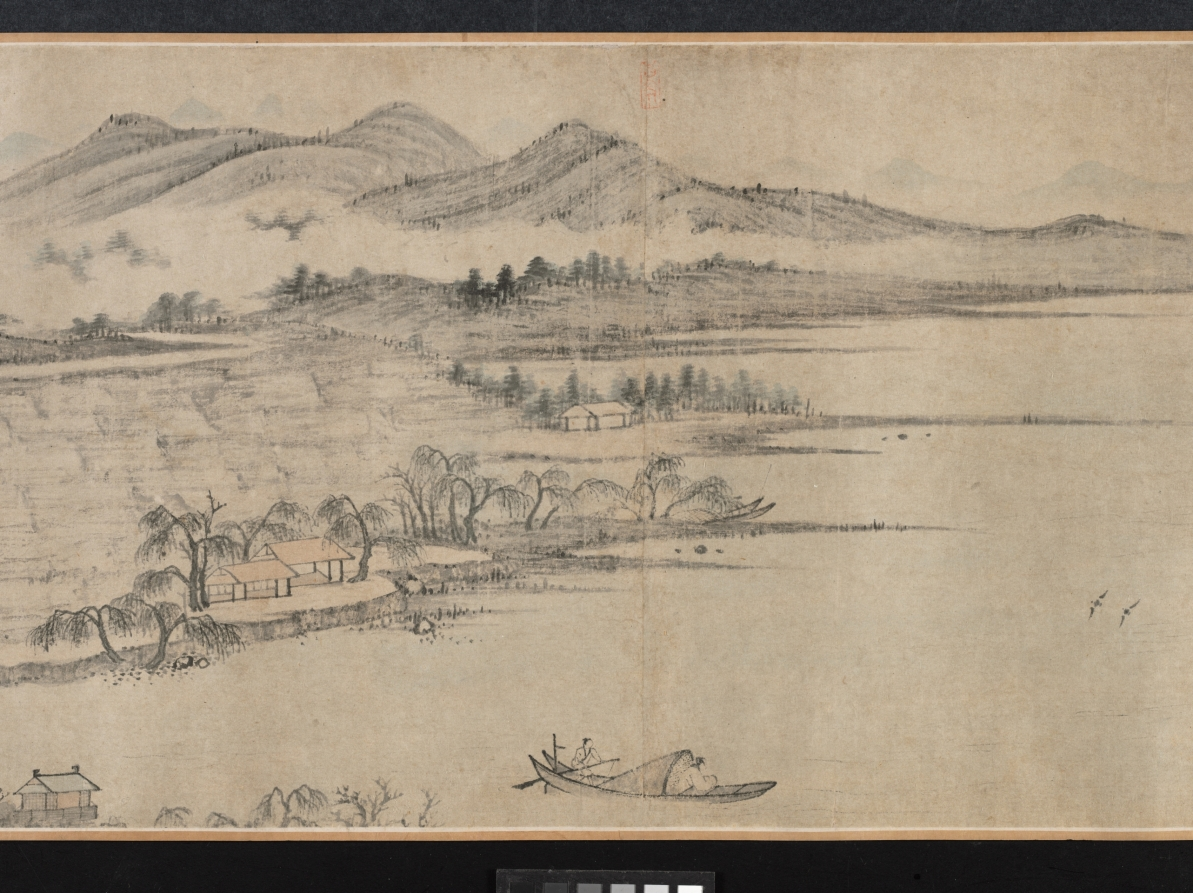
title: Mt. Taibo in the Style of Wang Meng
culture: China, Ming dynasty (1368–1644)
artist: Du Qiong (Chinese, 1396–1474)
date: 1442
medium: handscroll; ink and light color on paper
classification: Painting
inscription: Artist's inscription, signature, and 11 seals: [1 seal] Tung-yüan chai. Huang-ho-shan-ch'iao [Wang Meng] painted a painted called T'ai-po Mountain. Its brushwork is superior and admirable, which is very close to Yu-ch'en [Wang Wei, 699-759]. The cleverness of its composition, the maple groves and rustic temples, the inaccessible ravines and autumnal plateaus, the periolous peaks and strange rocks, etc., all seem to be so natural. The paper is only a little over eight feet, but the landscape has the range of a thousand miles. Once you open and note the contents, it is as if one were roaming among the mountain peaks enveloped in mist and clouds, and forgot the dusty world. When I first saw this, I was so mixed with excitement and joy that I could not take my hands off the painting. So I put it on the table, and tried my best to imitate it, forgetting sleeping and eating for about three months before it was completed. Although I do not dare to tread in the footsteps of Huang-ho shan ch'iao, I took great pains to capture his spirit in composition and colors. I do not know whether it would pass the judgment of the experts. On the fifteenth day of the fifth month, the seventh year of the Cheng-t'ung year [1442], inscribed by Tung-yüan, Tu Chiung. [2 seals] Yung-chia; Ching-chieh ming-men. [8 seals on painting] Tung-yüan chai; Ching-chieh ming-men; Yung-chia; Tu Ch'iung yin; Tung-yüan (repeated 5 times). trans. WKH/LYSL 3 colophons and 7 additional seals: 1 colophon and 2 seals of Chou Ting (1401-1487); 1 colophon and 2 seals of Wu K'uan (1435-1504); 1 colophon, dated 1655, and 2 seals of Lan Ying (1585-after 1664).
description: When a Chinese painter "imitated" a painting by a past master, the intention was never to produce an exact copy. Du Qiong, the Ming painter from Suzhou, is a case in point. The painting style of this handscroll is actually closer to that of Huang Gongwang (1269–1354) than to the style of Wang Meng (about 1301–1385). Both masters were active during the previous dynasty and are among the so-called Four Great Masters of the Yuan dynasty (1279–1368). In this painting, the interplay of styles, including Du Qiong's own, contribute to an inner dimension that is more than visual. Mt. Taibo is located in the province of Zhejiang and is known for its scenic beauty. In this scroll, however, it is not depicted literally. The image is an ideal representation of mountains in southeastern China.